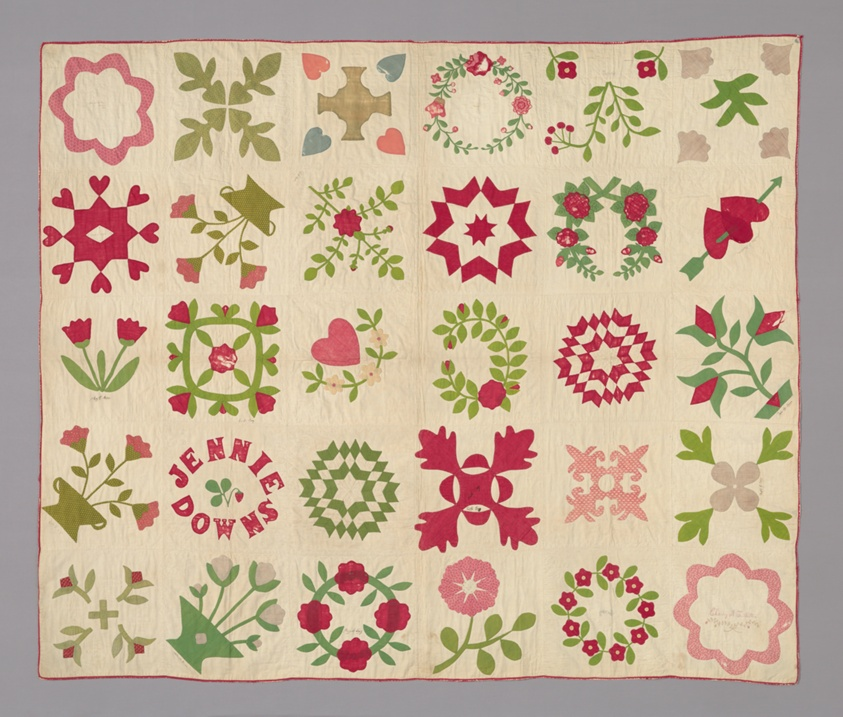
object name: Textile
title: Bedcover (Bride's Album Quilt)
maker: Fanny Lovejoy (born Hicks, 1856/57); Weston, Vermont, United States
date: c. 1850/60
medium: Appliquéd and quilted blocks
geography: United States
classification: textile; needlework - quilt; needlework (visual works)